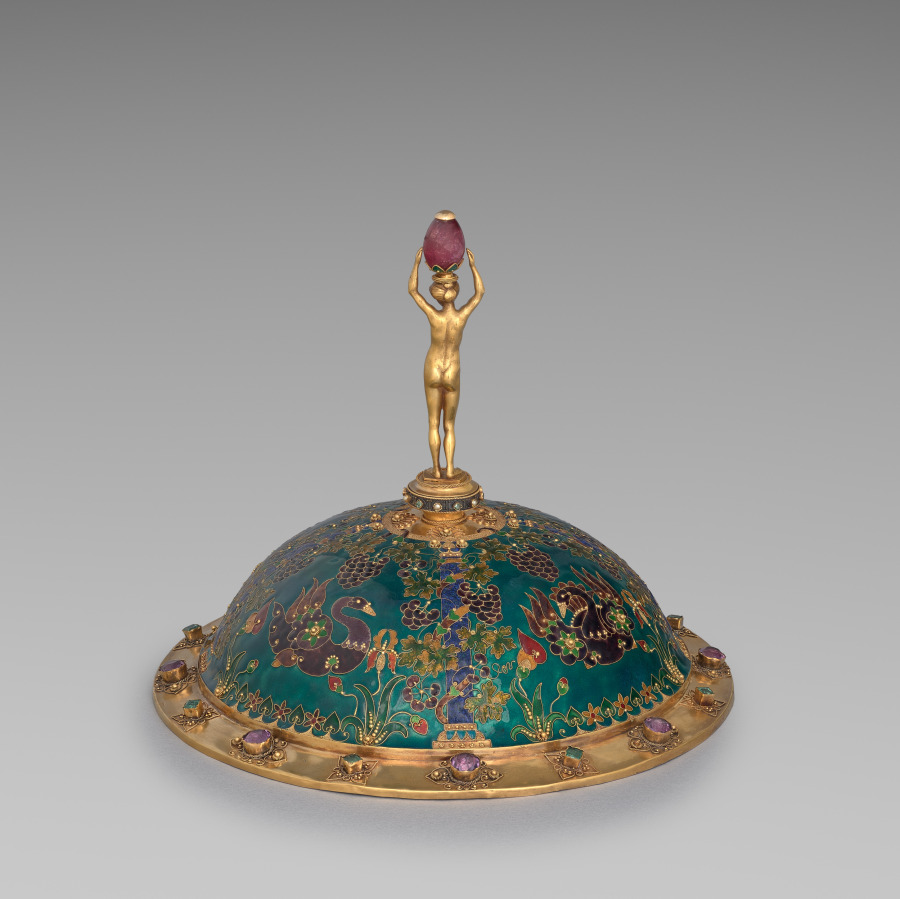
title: Cover for a Cup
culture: France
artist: Armand Point (French, 1861–1932)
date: c. 1897–99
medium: amethyst, silver-gilt, cloisonné enamel, aquamarine, rubies, malachite, lapis lazuli, pearls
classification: Metalwork